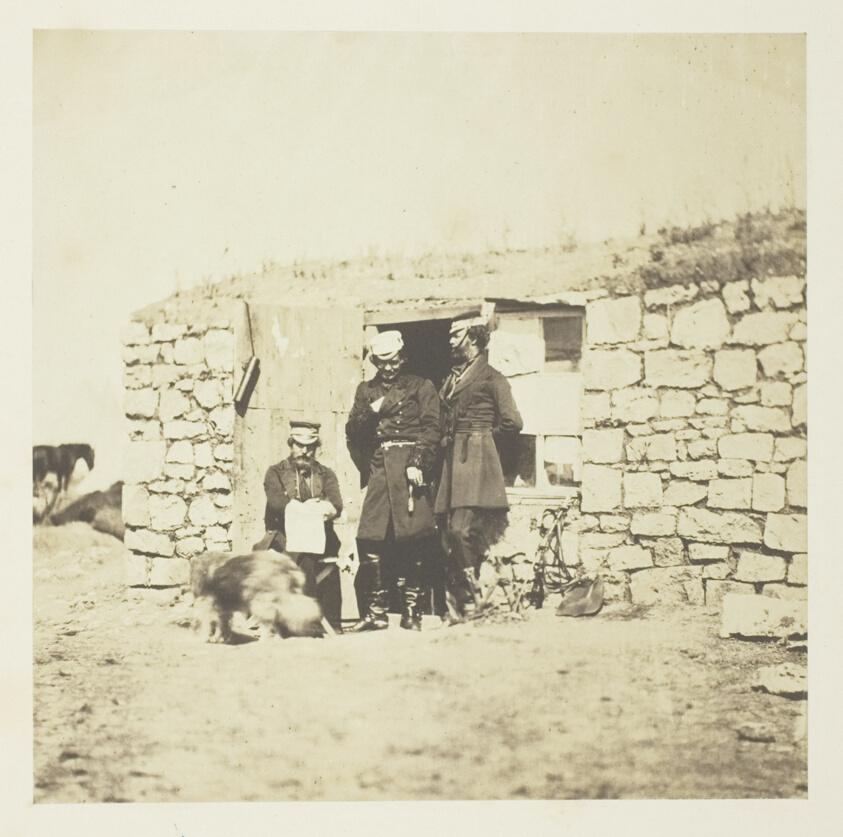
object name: Photograph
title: Officers on the Staff of Lieutenant General Sir Richard England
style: 19th century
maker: Roger Fenton (English, 1819–1869)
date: 1855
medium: Salted paper print, plate 53 from the album "Photographs Taken in the Crimea" (1856)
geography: England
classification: salted paper print; photographic process; photography; photograph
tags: Collected by Hugh Edwards, Crimea 1856